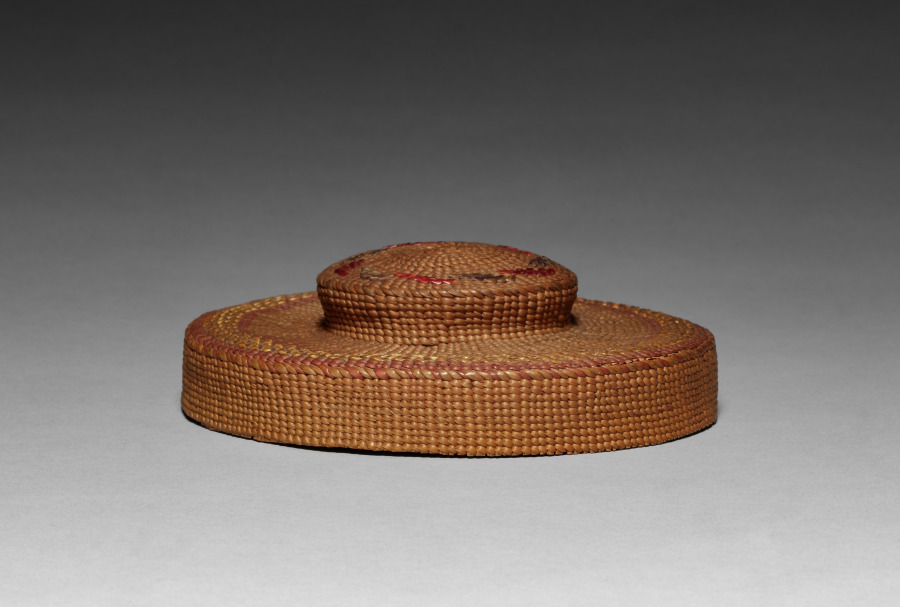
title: Cover for a Basket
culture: Northwest Coast, Haida, Unassigned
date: Unassigned, before 1917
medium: twilled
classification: Basketry